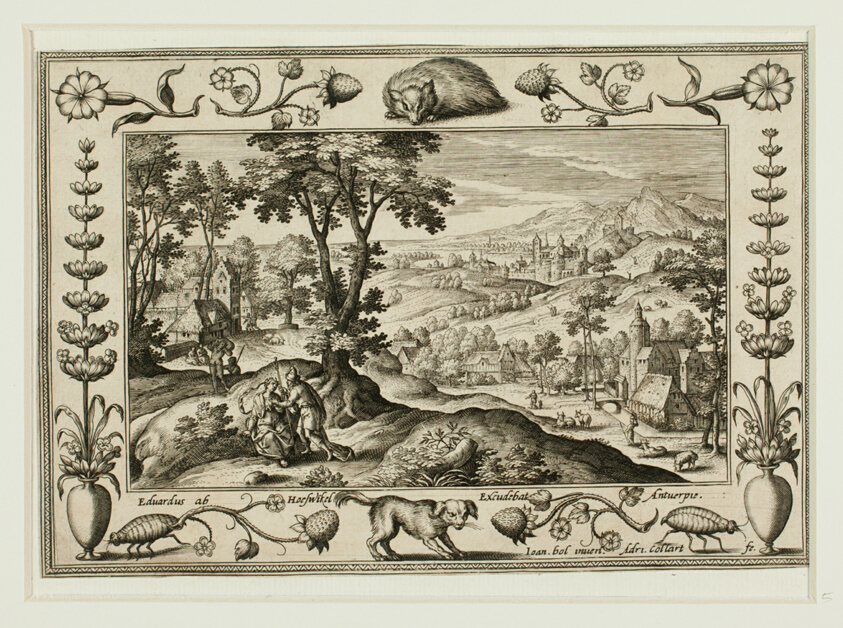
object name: Print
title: Judah and Tamar, from Landscapes with Old and New Testament Scenes and Hunting Scenes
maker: Adriaen Collaert (Flemish, c. 1560–1618); after Hans Bol (Flemish, 1535–1593); published by Anna van Hoeswinckel (Flemish)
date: 1584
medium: Engraving in black on cream laid paper, laid down on cream laid paper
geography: Flanders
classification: engraving; paper; print; prints and drawing